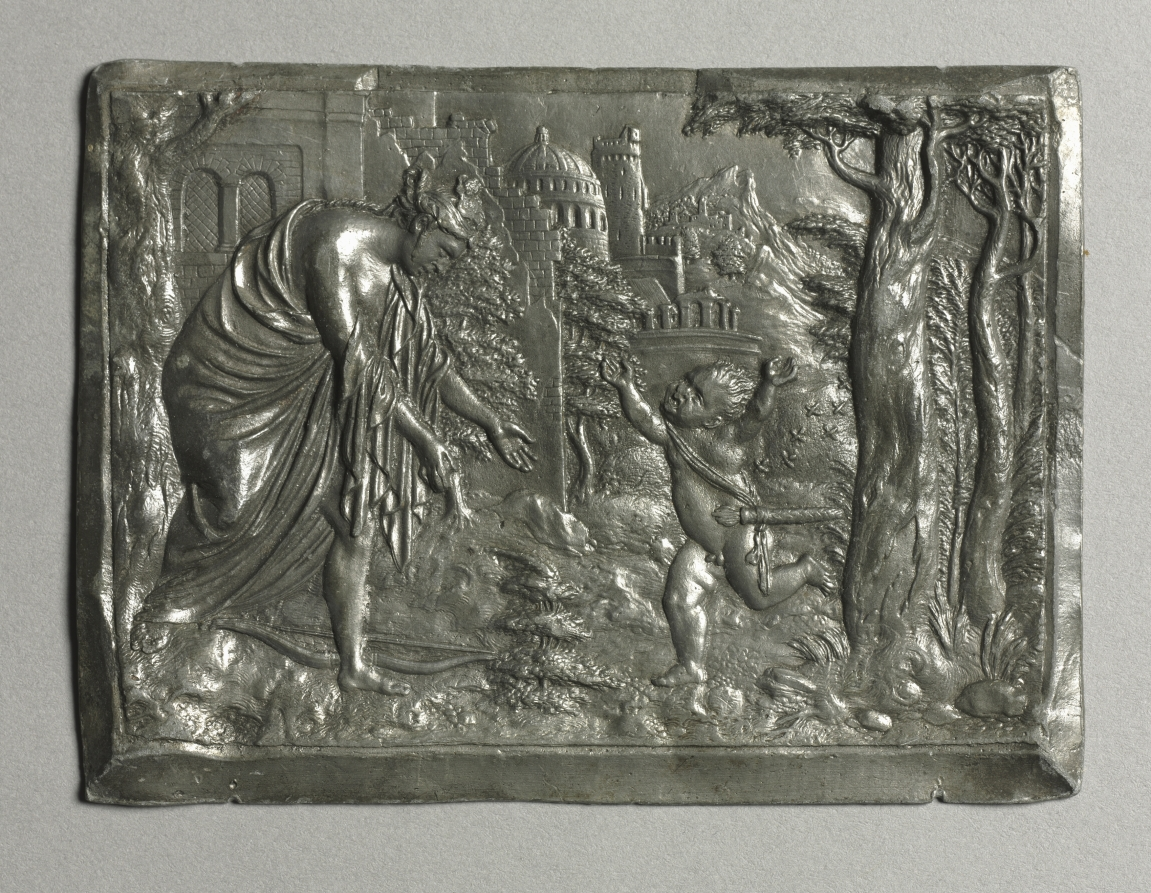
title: Cupid Complaining to Venus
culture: Germany, Nuremberg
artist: Peter Flötner (German, 1485–1546)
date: c. 1540–46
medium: lead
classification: Sculpture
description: This plaquette interprets an ancient Greek poem by Theocritus. Having been stung by a swarm of bees after attempting to steal their honey, Cupid sought refuge in the arms of his mother Venus, the goddess of love. Surprised that such small creatures could cause such great pain, Venus reminded Cupid, that like the sting of a bee, love’s arrow could be dangerous.